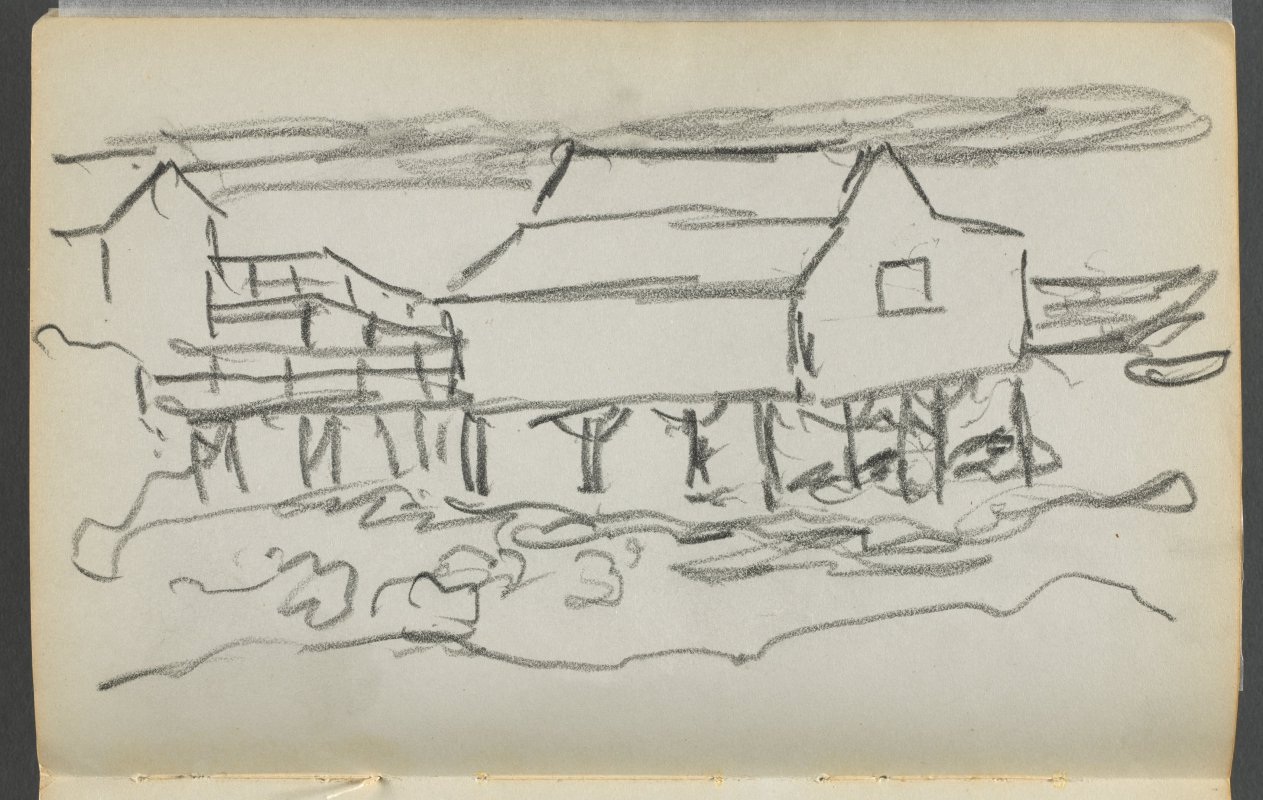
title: Sketchbook, The Dells, N° 127, page 014: House on a Dock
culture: America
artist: Maurice Prendergast (American, born Newfoundland [now Canada], 1858–1924)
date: c. 1919–1921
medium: graphite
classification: Bound Volume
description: This sketchbook contains 59 pages of graphite drawings and 16 watercolors made at various locations on Cape Ann, Massachusetts.